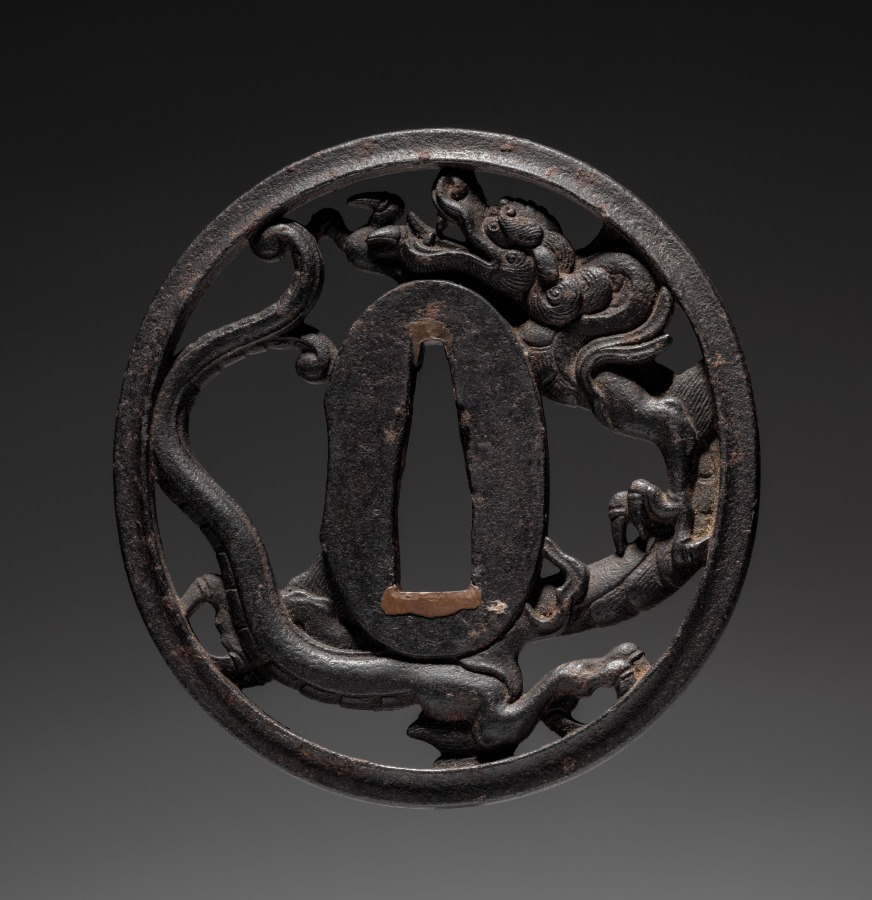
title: Sword Guard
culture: Japan, Edo period (1615–1868)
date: 1615–1868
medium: iron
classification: Arms and Armor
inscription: Signature: Tsuju (Michinaga), residing at Mito, made